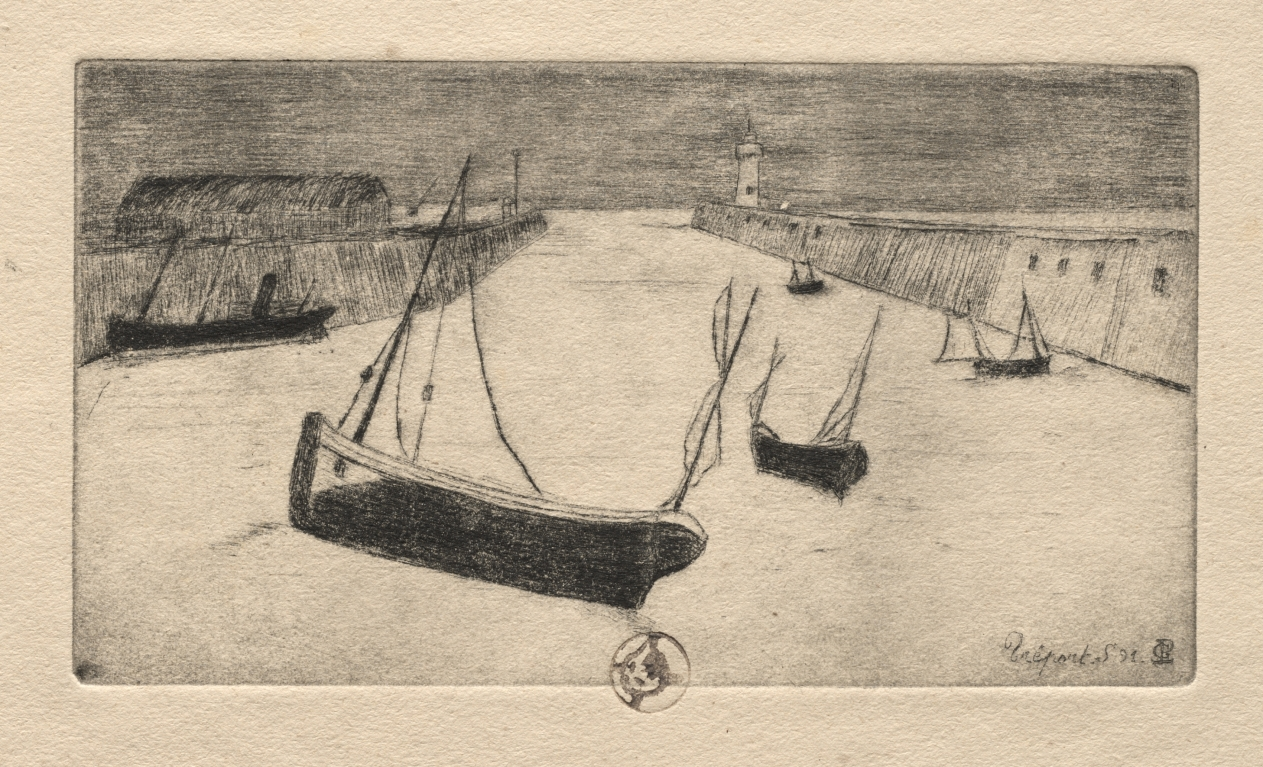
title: Six Etchings: Tréport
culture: France, 19th century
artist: Paul Gachet (French, 1828–1909)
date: 1895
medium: etching, roulette, and drypoint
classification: Print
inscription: verso, ink brown ink; Le Tréport